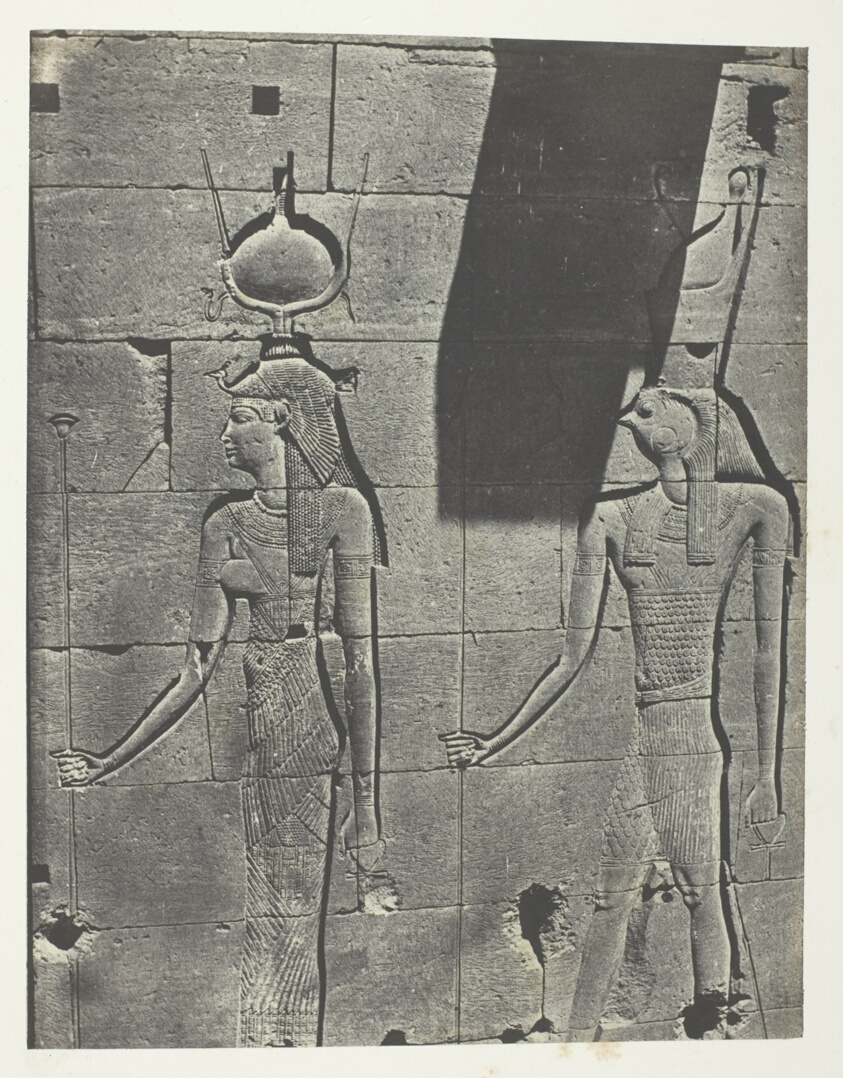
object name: Photograph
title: Kalabscheh, Sculptures De La Façade Postérieure Du Temple; Nubie, plate 92 from the album "Egypte, Nubie, Palestine et Syrie" (1852)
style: 19th century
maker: Maxime Du Camp (French, 1822–1894)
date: 1849/51, printed 1852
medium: Salted paper print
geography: France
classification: salted paper print; photographic process; photography; photograph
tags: Collected by Hugh Edwards, Egypte, Nubie, Palestine et Syrie